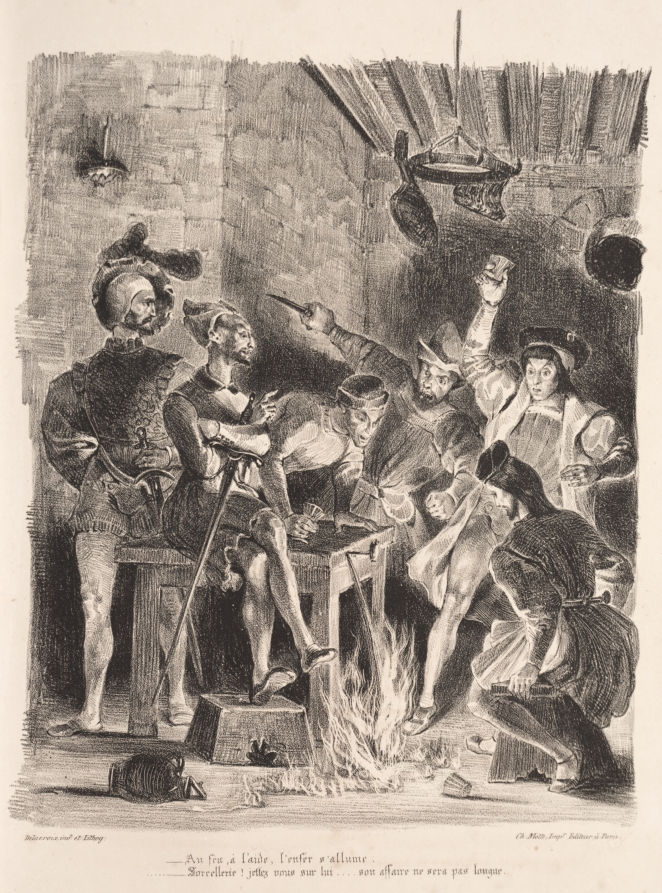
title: Illustrations for Faust: Méphistophélés in the tavern of the students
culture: France, 19th century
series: Faust: Tragédie de M. de Goethe, translated into French by Albert Stapfer.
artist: Eugène Delacroix (French, 1798–1863)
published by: Chez Ch. Motte, Éditeur, distributed by Chez Sautelet, Libraire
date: 1828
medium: lithograph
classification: Print